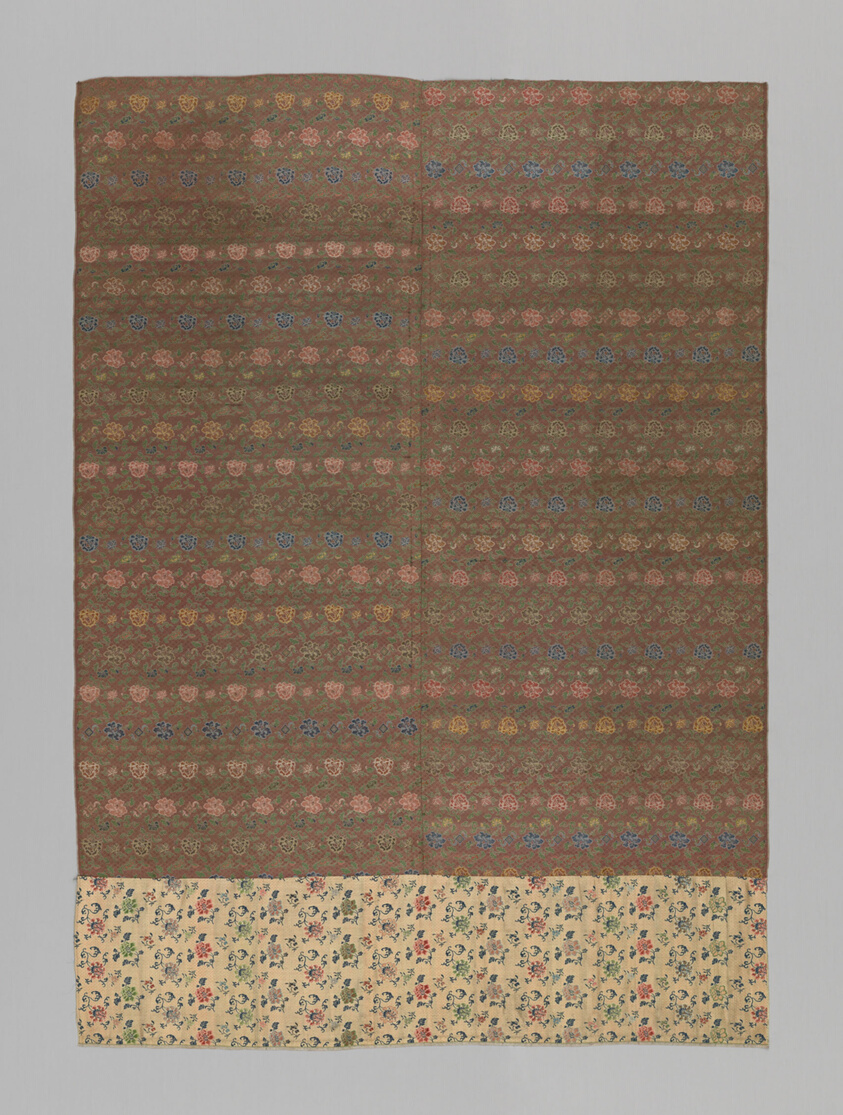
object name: Textile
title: Panel (Furnishing Fabric)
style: qing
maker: China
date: Qing dynasty (1644–1911), 1875/1900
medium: Rose-tan brocaded ground with allover pattern of flowers and diamond shapes in blue, rose, yellow and green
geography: China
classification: textile; weaving; furnishing textile